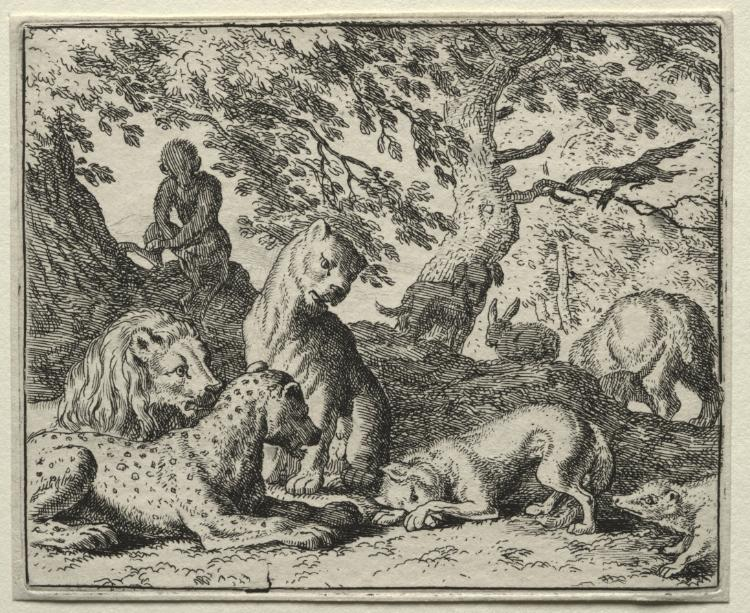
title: Reynard the Fox: Reynard Describes a False Plot Against the Lion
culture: Netherlands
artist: Allart van Everdingen (Dutch, 1621–1675)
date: 1650–75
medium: etching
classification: Print